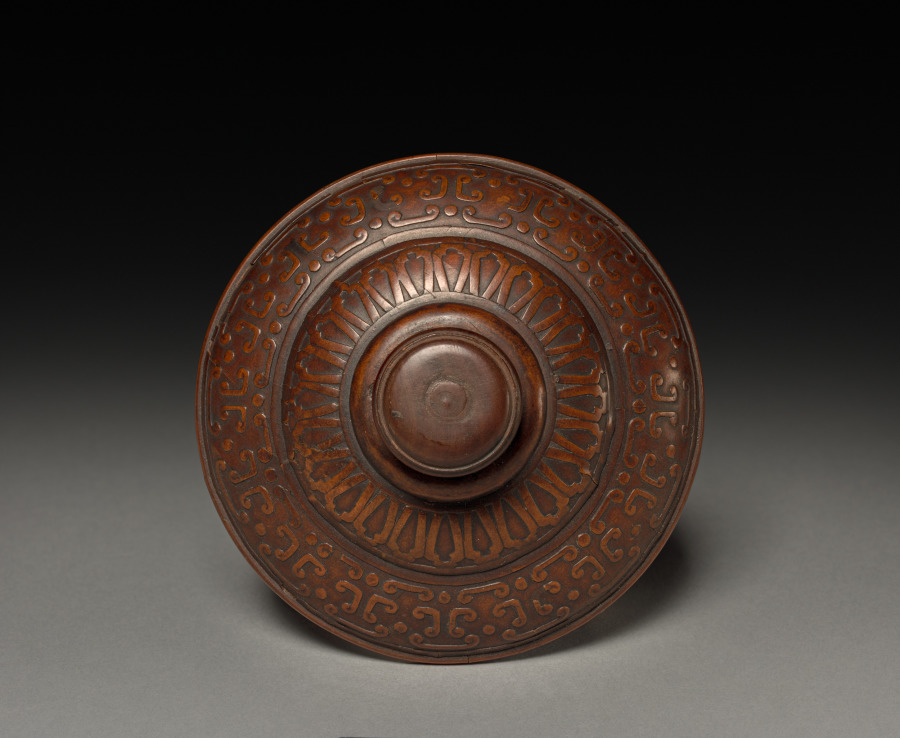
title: Tripod with Cover (lid)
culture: China, Qing dynasty (1644-1911)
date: late 1700s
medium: carved wood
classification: Wood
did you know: Each leg of the tripod is decorated with a lion head.